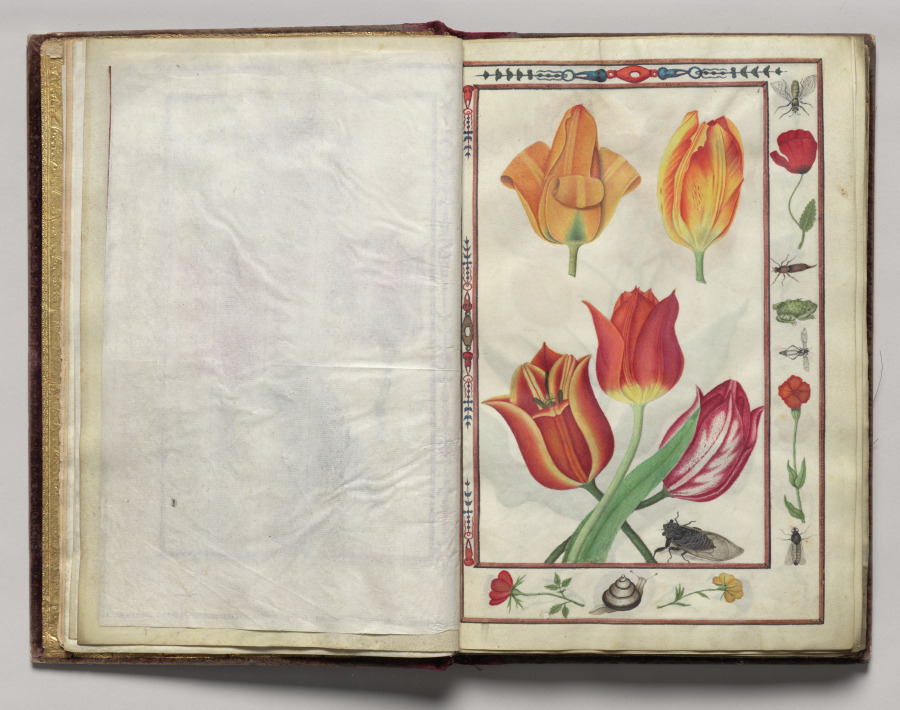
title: Tulips with Poppy, Carnation, Snail, Bug, and Frog Border, folio 3 (recto), from Florilegium (A Book of Flower Studies)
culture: France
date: 1608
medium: watercolor, ink, silver, and gold over occasional traces of pencil, on vellum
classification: Bound Volume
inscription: Dated: Poitiers 1608 (on frontispiece) Signed: On frontispiece in black ink, lower right: Van Kuyk Notation on drawing: Frontispiece: in pencil, lower margin: * élève de Van Kessel, peintre flammand (* in pencil also appears in front of Van Kuyk's name).